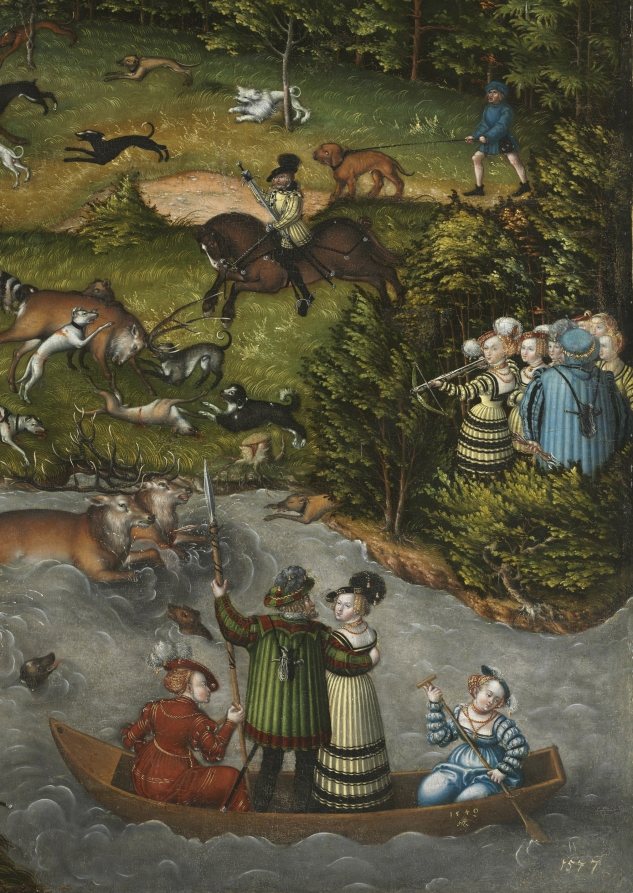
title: Hunting near Hartenfels Castle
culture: Germany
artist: Lucas Cranach (German, 1472–1553)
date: 1540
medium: oil, originally on wood, transferred to masonite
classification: Painting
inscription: Signed lower right on boat with a winged serpent, and dated: 1540 [inventory number, lower right: 1577]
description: The Protestant rulers of Saxony commissioned this animated hunt scene, set near their residence seen in the background, Hartenfels Castle (in eastern Germany). John Frederick the Magnanimous, in the bottom left corner, wears dark green hunting attire; he spans his crossbow and waits for his courtiers and dogs to chase a stag across the river. His wife, the Electress Sibylle, stands at right, poised to take the first ceremonial shot. The prince electors of Saxony were passionate practitioners of hunting with dogs—elaborate, highly rehearsed occasions, coordinated by the use of signals from hunting horns. Cranach dated this work and his signature is the winged snake at lower right. 1577 in the right corner is an inventory number.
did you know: Humans, dogs, and deer make up most of the creatures in this busy scene—but not all of them! Look closely at the background to spot a bear and three boars.